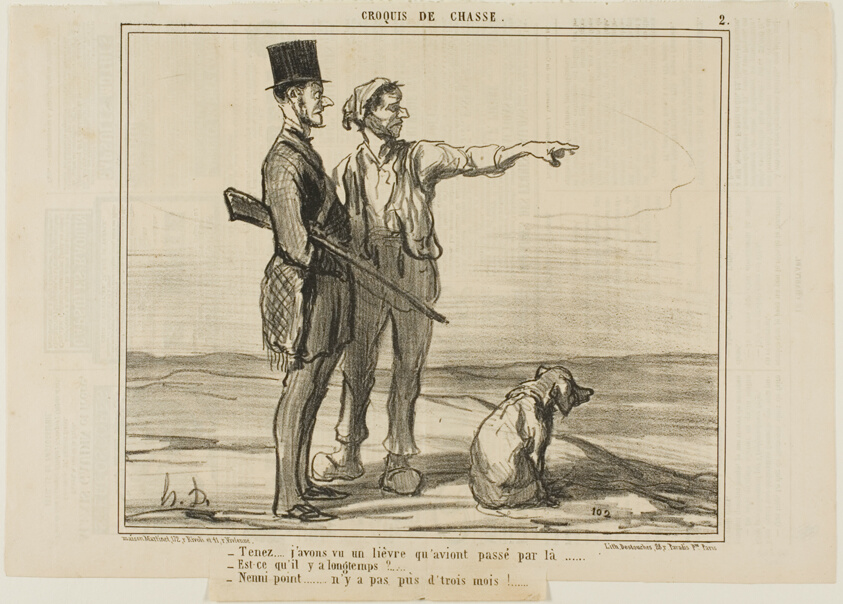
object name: Print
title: “- Listen... I saw a hare over there... - Was that a long time ago? - Not at all... it was less than three months ago...,” plate 2 from Croquis De Chasse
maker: Honoré Victorin Daumier; French, 1808-1879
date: 1857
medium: Lithograph in black on buff wove paper, with letterpress verso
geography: France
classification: lithograph; print; prints and drawing